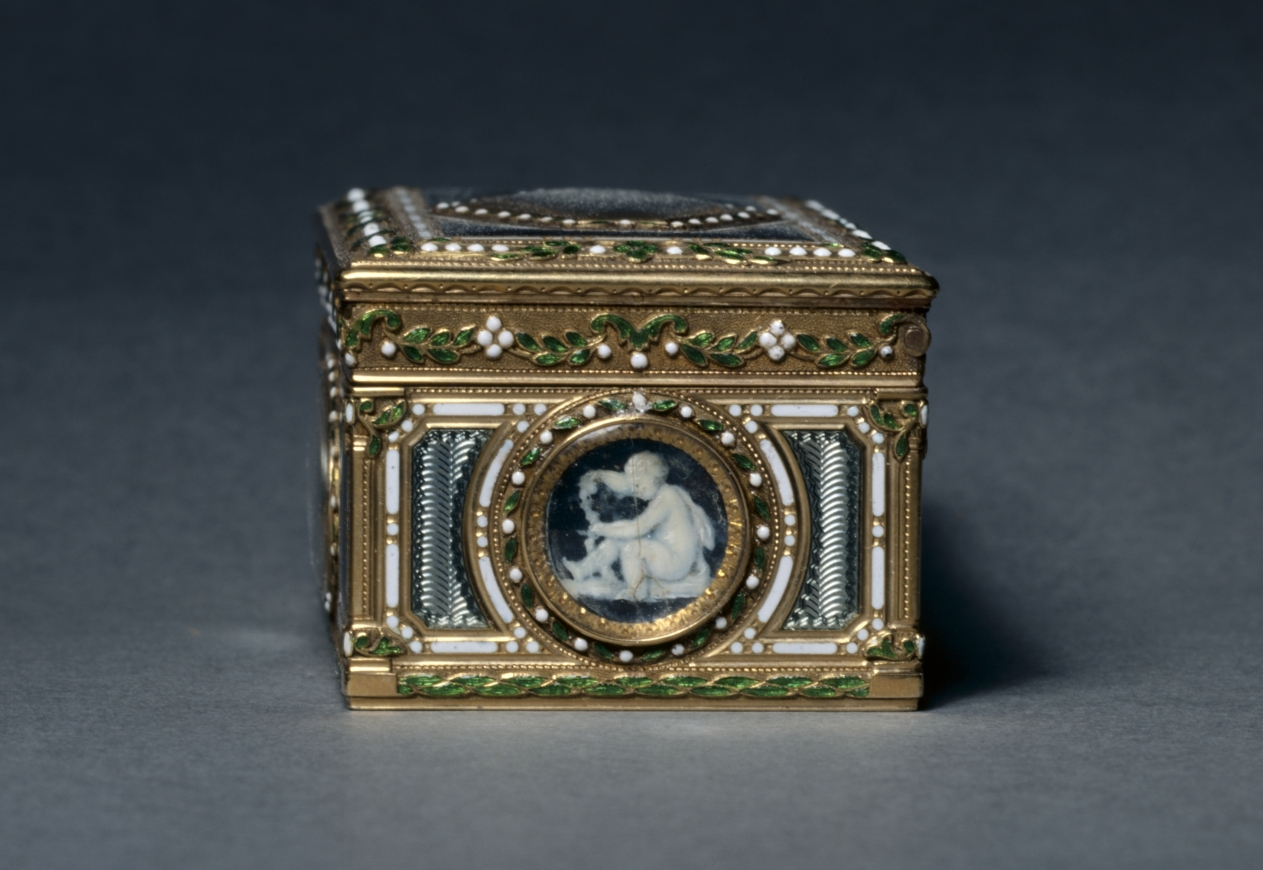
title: Snuff Box (Tabatière)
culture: France, 18th century (style of Louis XVI)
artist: François Chazeray (French)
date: 1777–78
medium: gold and enamel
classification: Metalwork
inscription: [Maker's mark of François Chazeray, master goldsmith in 1760, cover; bottom; front wall]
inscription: [Warden's mark (probably a crowned "O"), Paris, 1777-1778, cover; bottom; front wall]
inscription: [Illegible mark, bottom]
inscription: [Illegible mark, cover]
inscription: [Illegible charge mark, inside front]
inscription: [Discharge mark of Jean-Baptiste Fouache, Paris, 1774-1780, on neck at left.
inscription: [Outside of neck, modern inscription '4 (modern inscription]:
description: This box is decorated with figures of antiquity associated with love: winged cupids, dancing nymphs, and representations of the Greek goddess of love. These scenes are inspired by antique cameos, intricately carved gemstones crafted in ancient Greece and Rome. This interest in ancient iconography, symmetry, and classical compositions of gods and goddesses was characteristic of 18th-century neoclassicism.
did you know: Decorated with allegorical scenes of love, it is likely that this box was a present between lovers.